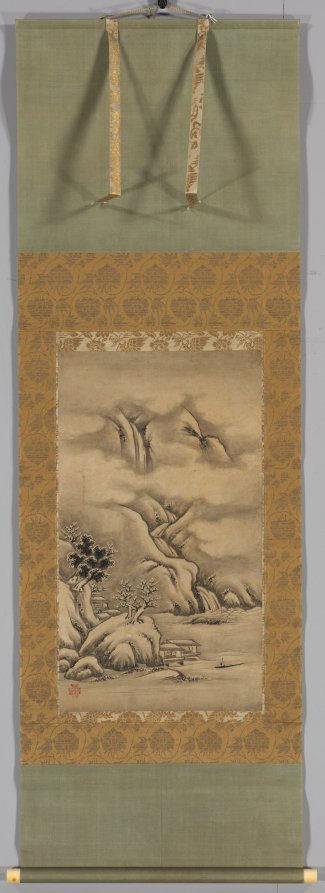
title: Seasonal Landscapes: Winter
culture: Japan, Muromachi period (1392–1573)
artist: Kano Hideyori (Japanese, active mid- to late 1500s)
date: mid- to late 1500s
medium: hanging scroll, ink on paper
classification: Painting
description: Now comprising three scrolls, this composition was originally a set of four paintings depicting the seasons. The set is among the most important of the artist’s surviving works. Each painting was executed in the gyō mode, indicating a speedy brush with rounded strokes. The terms shin (formal), sō (cursive), and gyō (semicursive), borrowed from calligraphy terminology, are terms commonly used by connoisseurs to describe brushwork in ink paintings.